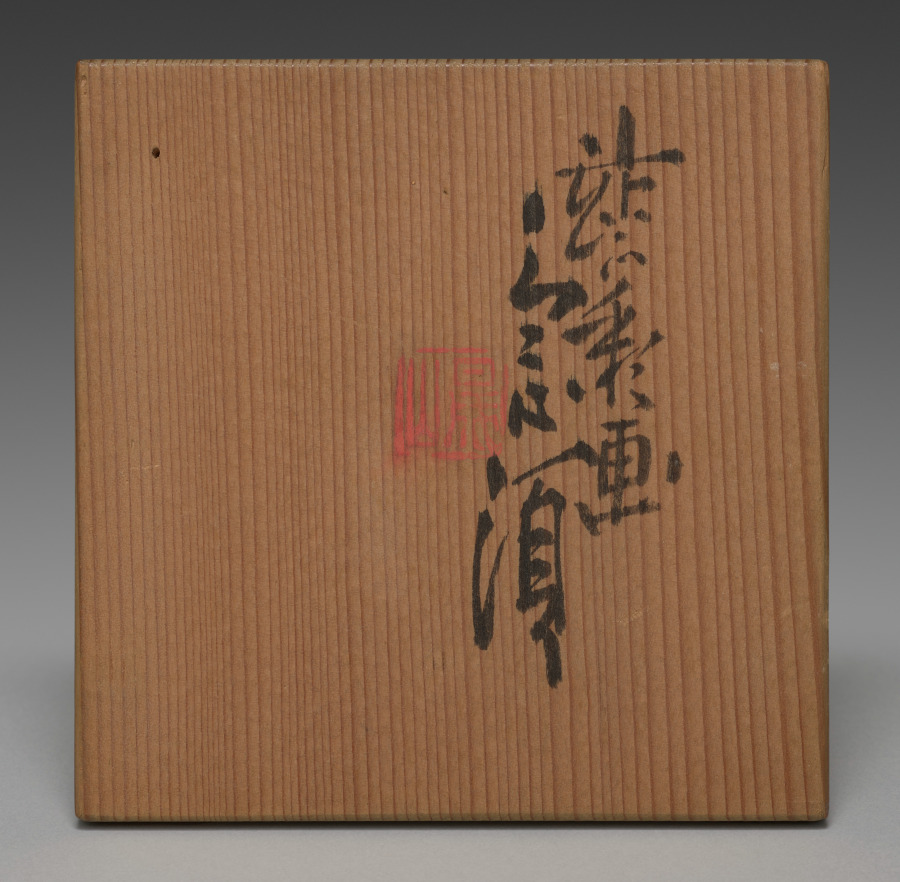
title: Teapot with Chrysanthemum Motifs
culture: Japan, Meiji period (1868–1912)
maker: Seifū Yohei III (Japanese, 1851–1914)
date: 1912–14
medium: Porcelain with overglaze color enamel and gold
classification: Ceramic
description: This side-handled sencha teapot has the lid flush against the body, forming an oblong orb. It is decorated with a sprinkling of similar chrysanthemum motifs in red, green, and purple overglaze color enamels with centers of pale red dotted with gold.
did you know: This teapot with chrysanthemum motifs shows off Seifū Yohei III’s technique of enamels painted over the glaze.